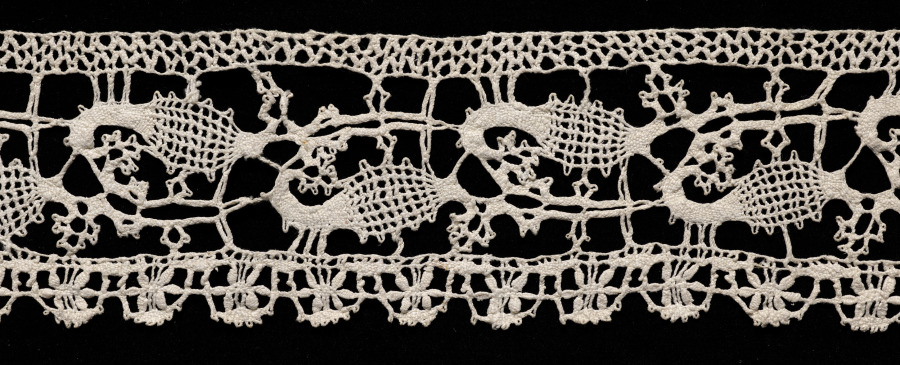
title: Lace Insertion and Edging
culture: Italy, Venice and Genoa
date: 1600–1640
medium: Bobbin lace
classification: Lace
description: In this bobbin lace fragment, the main body of the lace is Venetian while the edging is Genoese.